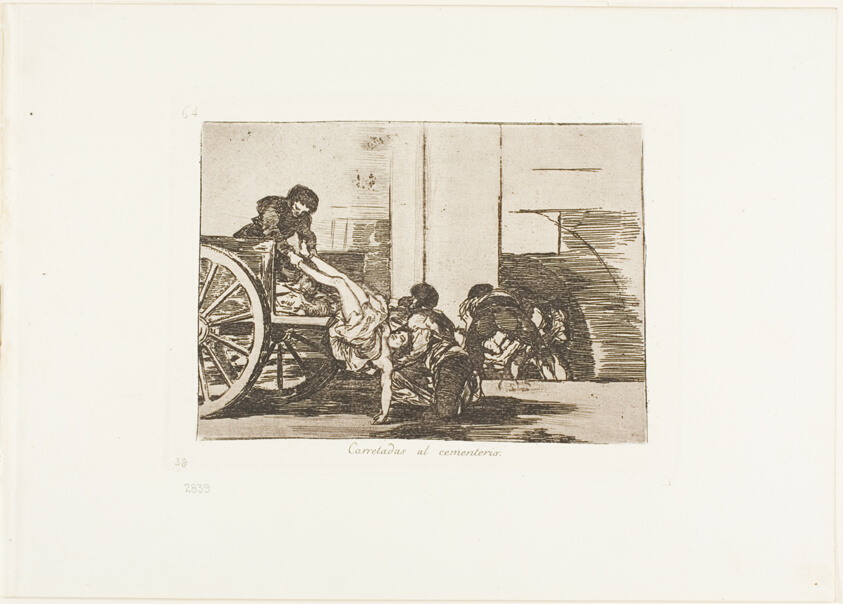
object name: Print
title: Cartloads to the cemetery, plate 64 from The Disasters of War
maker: Francisco José de Goya y Lucientes (Spanish, 1746-1828)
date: 1812/15, published 1863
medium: Etching, aquatint and drypoint in warm black on off-white wove paper with gilt edges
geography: Spain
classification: etching; print; prints and drawing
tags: war